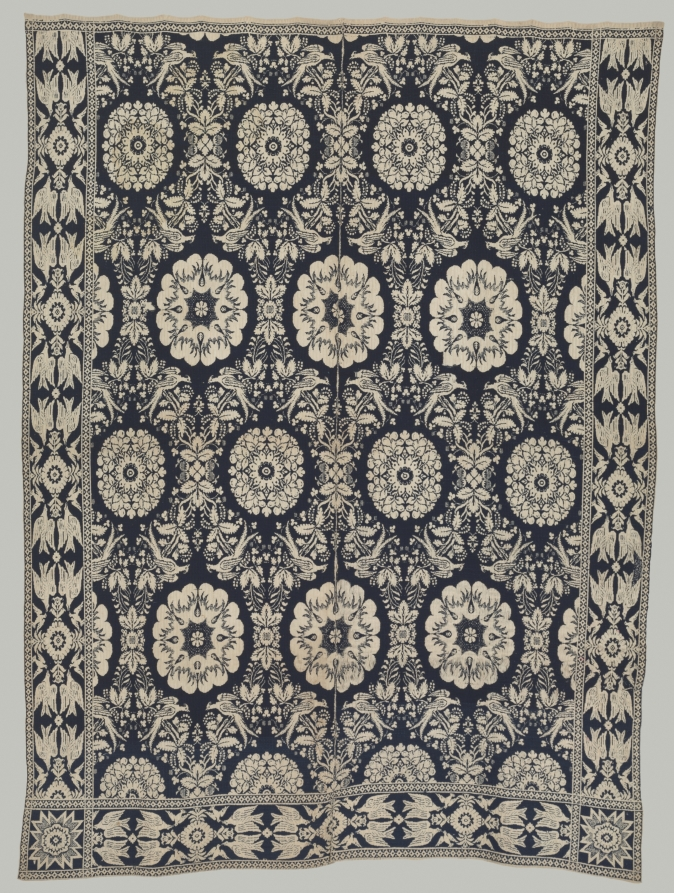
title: Coverlet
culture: America, New York ?, mid 19th century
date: mid 19th century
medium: double wool weave: wool and cotton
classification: Textile